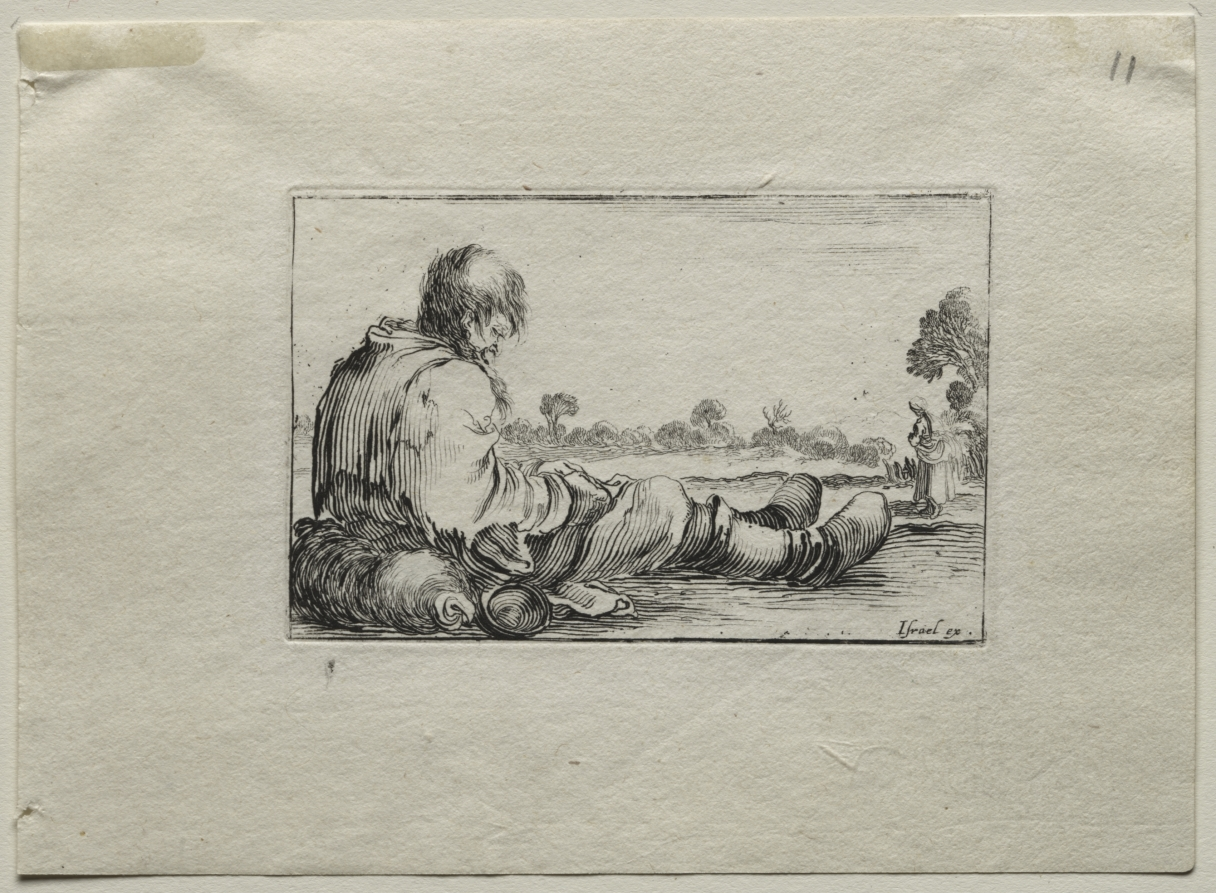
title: Caprices: Seated Beggar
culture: Italy, 17th century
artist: Stefano Della Bella (Italian, 1610–1664)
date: c. 1642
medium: etching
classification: Print